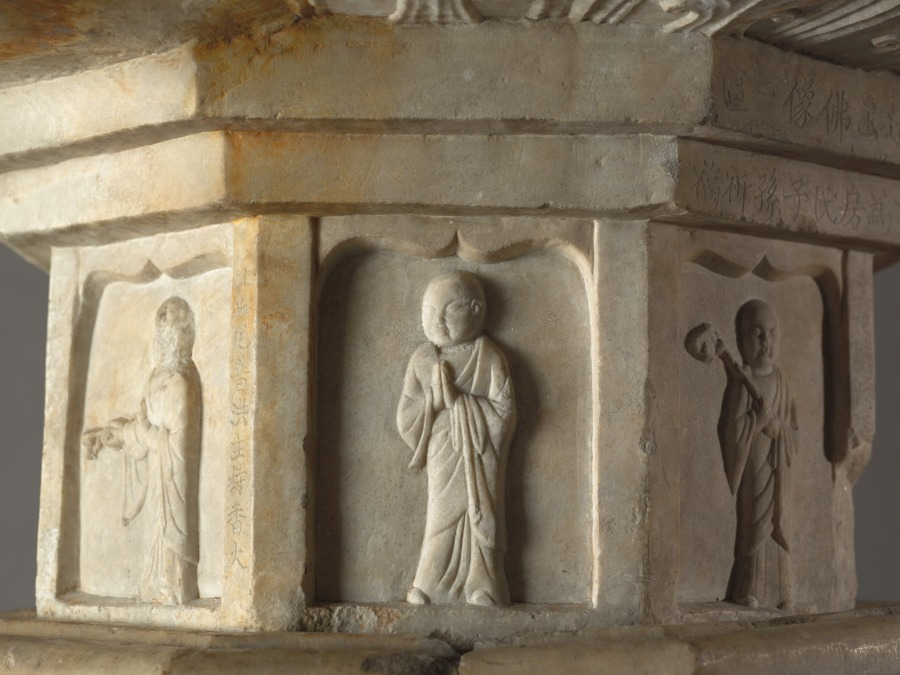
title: Fang Xuanling Pedestal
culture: China, Tang dynasty (618-907)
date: 647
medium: marble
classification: Sculpture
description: This double lotus pedestal exhibits the rich, ornate style of early Tang sculpture. It was commissioned by the Duke of Liang, Fang Xuanling (578–648), for the blessing of his second son and daughter-in-law, the Tang imperial princess of Gaoyang. The iconography and inscription suggest that it originally went with a statue, now missing, of Shakyamuni, the historical Buddha, instead of Amitayus. Today the pedestal is topped with Amitayus, the Buddha of Infinite Life, seated in meditation. Although the pedestal was not made with the statue, the combination is faithful to the original artistic conception.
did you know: In front, the top layer of the pedestal has an abstract curvilinear motif suggesting drapery; the rear is carved with a flower-and-leaf motif.